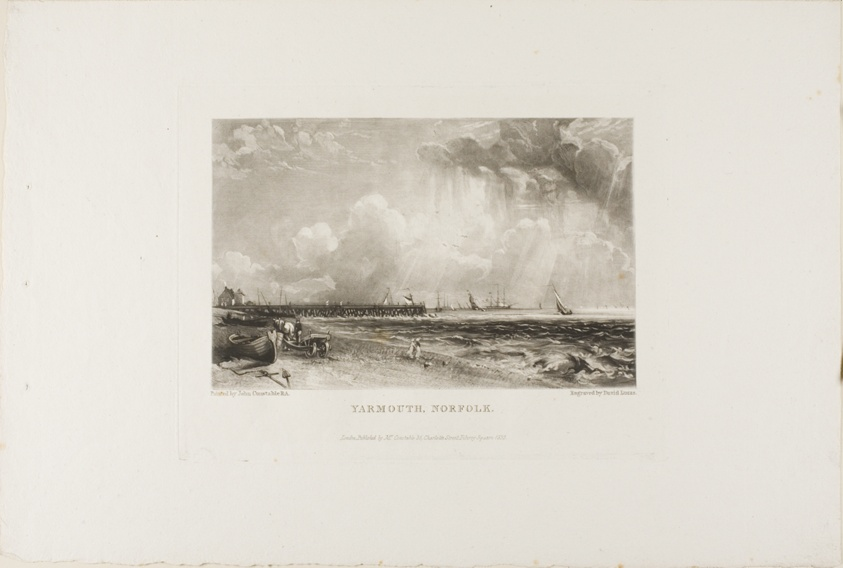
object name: Print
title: Yarmouth, Norfolk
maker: David Lucas (English, 1802-1881); after John Constable (English, 1776-1837)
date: 1832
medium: Mezzotint on paper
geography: England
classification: mezzotint; print; prints and drawing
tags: landscapes